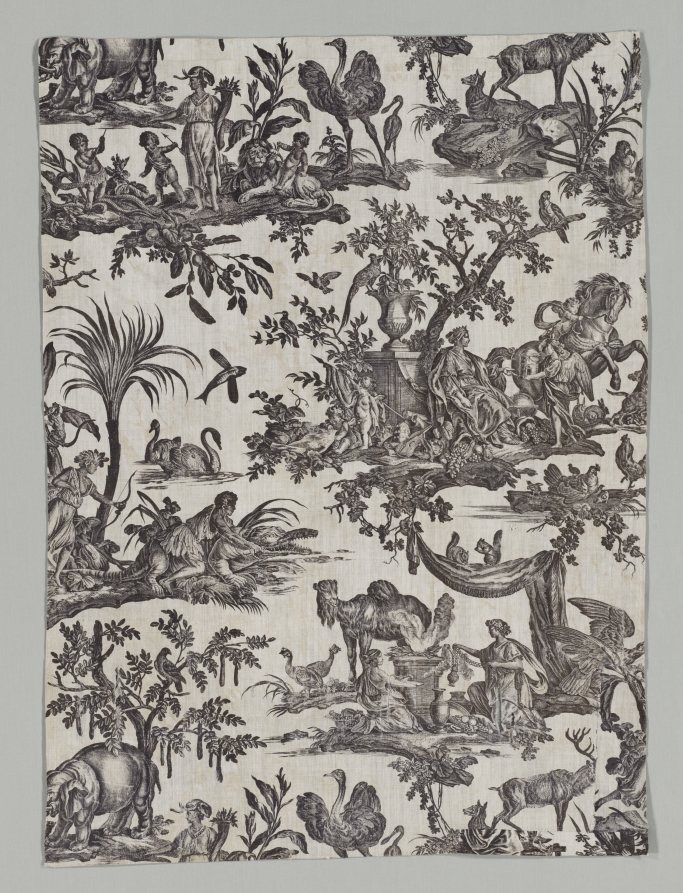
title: The Four Continents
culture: France, 18th century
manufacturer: firm of Christophe Philippe Oberkampf (French, 1738–1815)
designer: Jean-Baptiste Marie Hüet (French, 1745–1811)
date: 1790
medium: Cotton: copperplate printed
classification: Textile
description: Inspired by printed cottons from India, European manufacturers began printing textiles from copper plates in the 1750s. Originating in Ireland, the technique quickly spread to France where it flourished. Here, Jean-Baptiste Marie Huet I depicted female personifications of the four continents alongside their native flora and fauna. Although the artist based the plants and animals on real specimens observed at the Royal Botanical Gardens, he derived the personifications from racist stereotypes that imagined Europe as culturally superior: while Europe sits enthroned with symbols of the arts and knowledge at her feet, Africa wears an elephant headdress, America hunts an alligator, and Asia prays to a false god.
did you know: Marie-Antoinette visited the textile factory where this design was made.